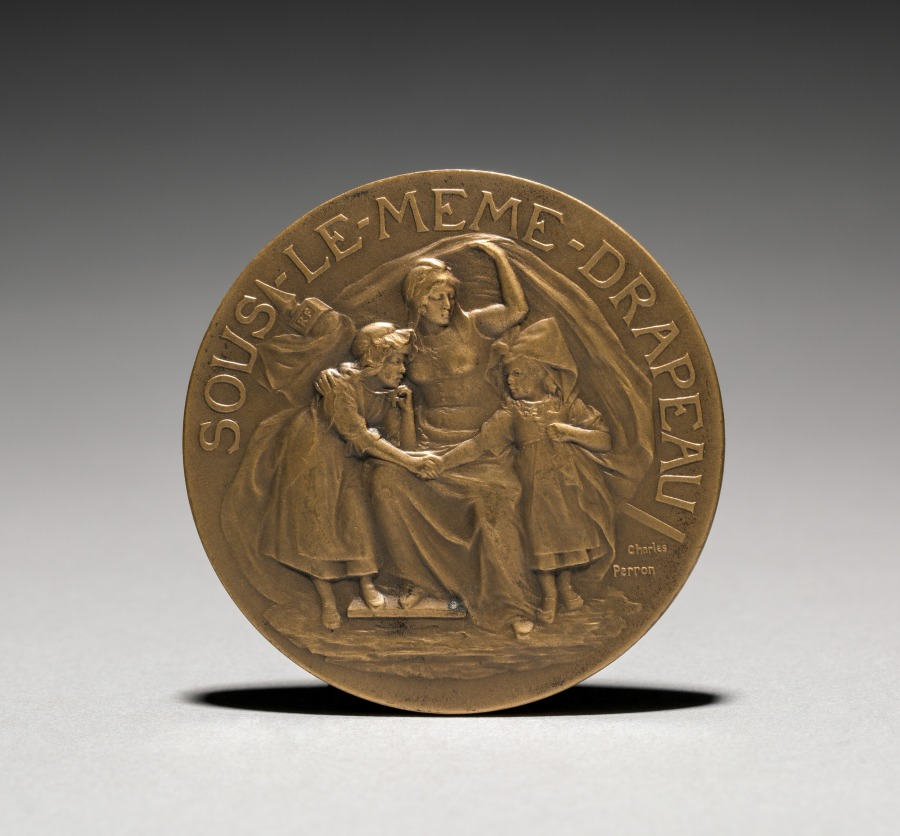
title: Medallion (obverse)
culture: France, 19th-20th century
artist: Charles-Theodore Perron (French, 1862–1934)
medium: bronze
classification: Metalwork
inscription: "SOUS LE MEME DRAPEAU" (Under the Same Flag); signed: "Charles Perron."